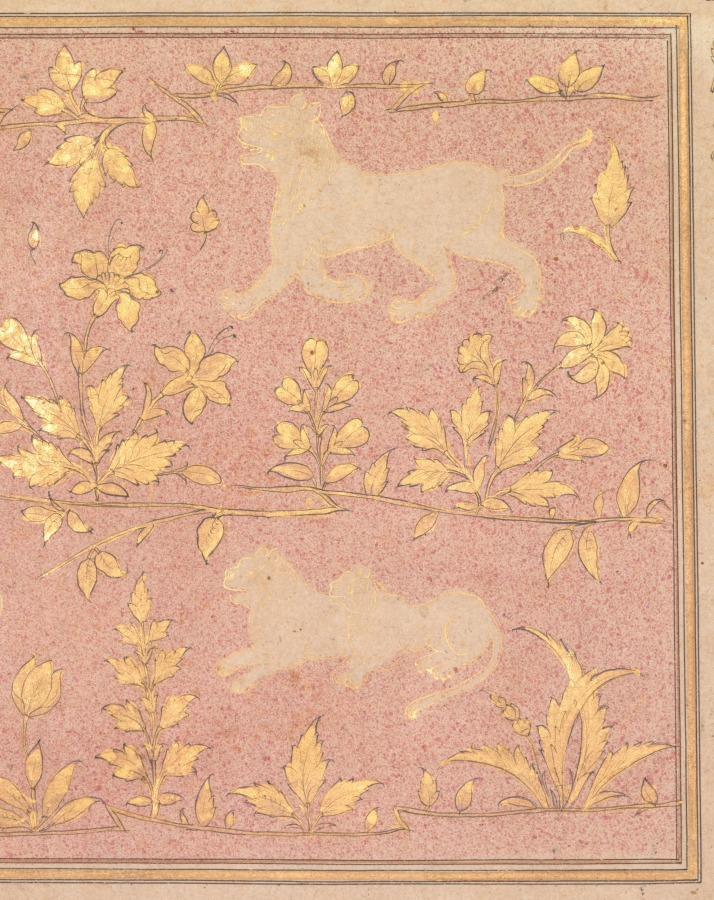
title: Stenciled Scenes of Lion and Gazelle (verso)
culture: Mughal India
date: c. 1710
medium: Gum tempera, ink, and gold on paper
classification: Painting